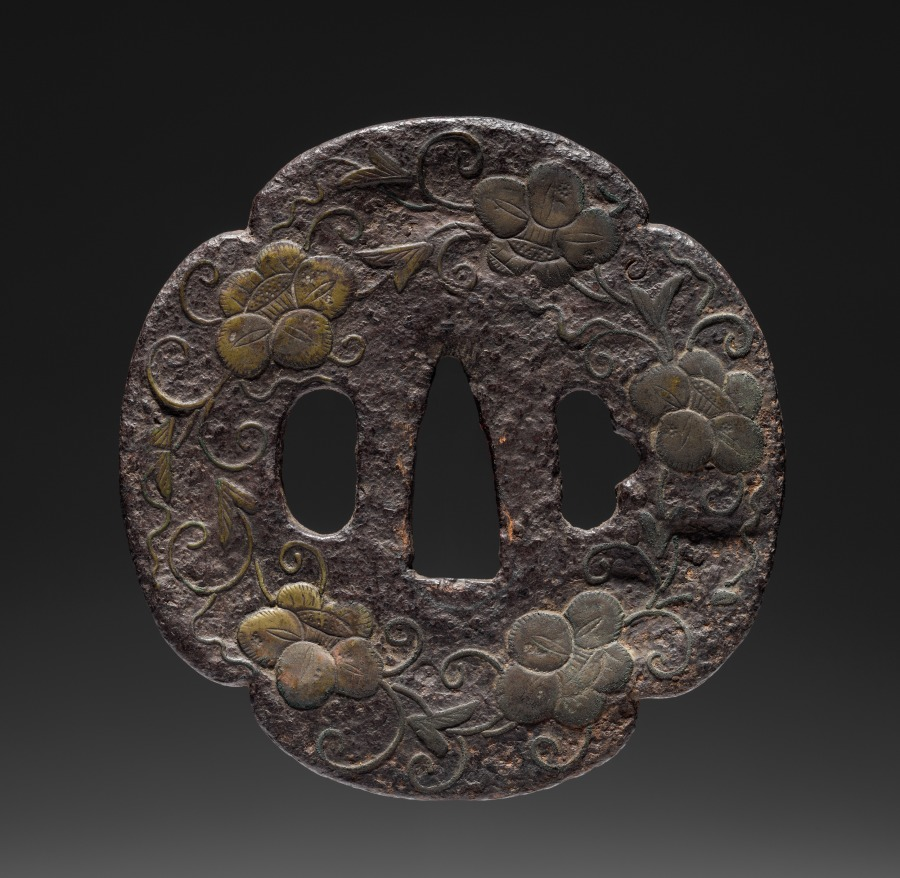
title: Sword Guard (Tsuba) with Camellia (Tsubaki)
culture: Japan, possibly Edo period (1615-1868)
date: c. 1615–1868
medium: iron with brass inlay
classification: Arms and Armor